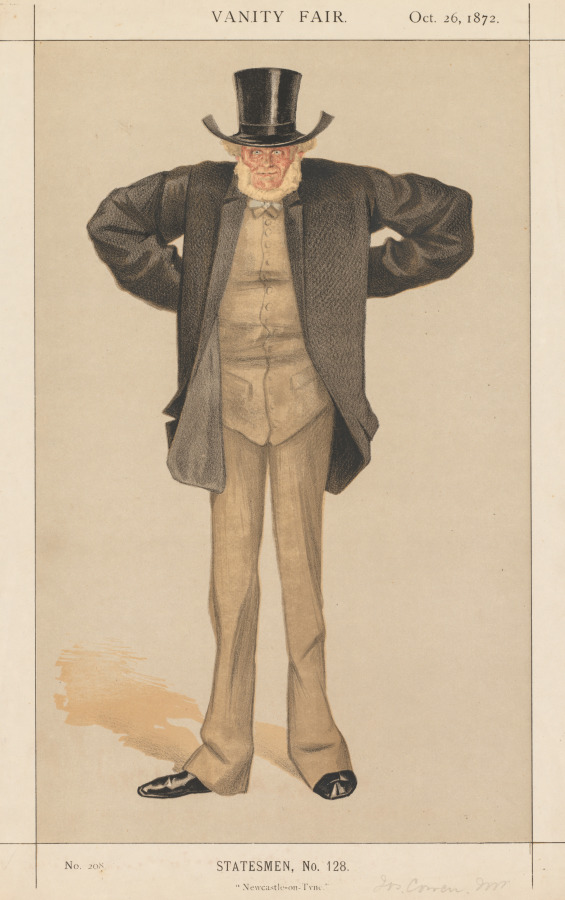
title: Vanity Fair: Statesman, No. 128 "Newcastle-on-Tyne"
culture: France, 19th century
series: published in Vanity Fair Oct. 26, 1972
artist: James Tissot (French, 1836–1902)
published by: Published in Vanity Fair, vol. VIII, July to December, 1872, p. 134. Mr. Joseph Cowen, M.P.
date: 1872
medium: color lithograph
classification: Print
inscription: Lower right, in graphite: Mr. Cowen MP